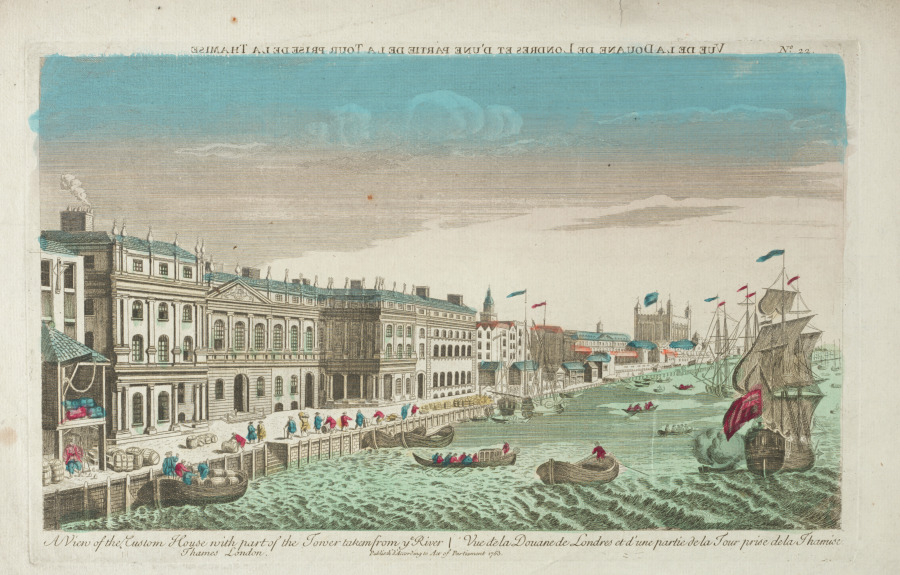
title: View of the Custom House and Douana of London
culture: England, 18th century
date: 1763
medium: Hand-colored engraving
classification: Print